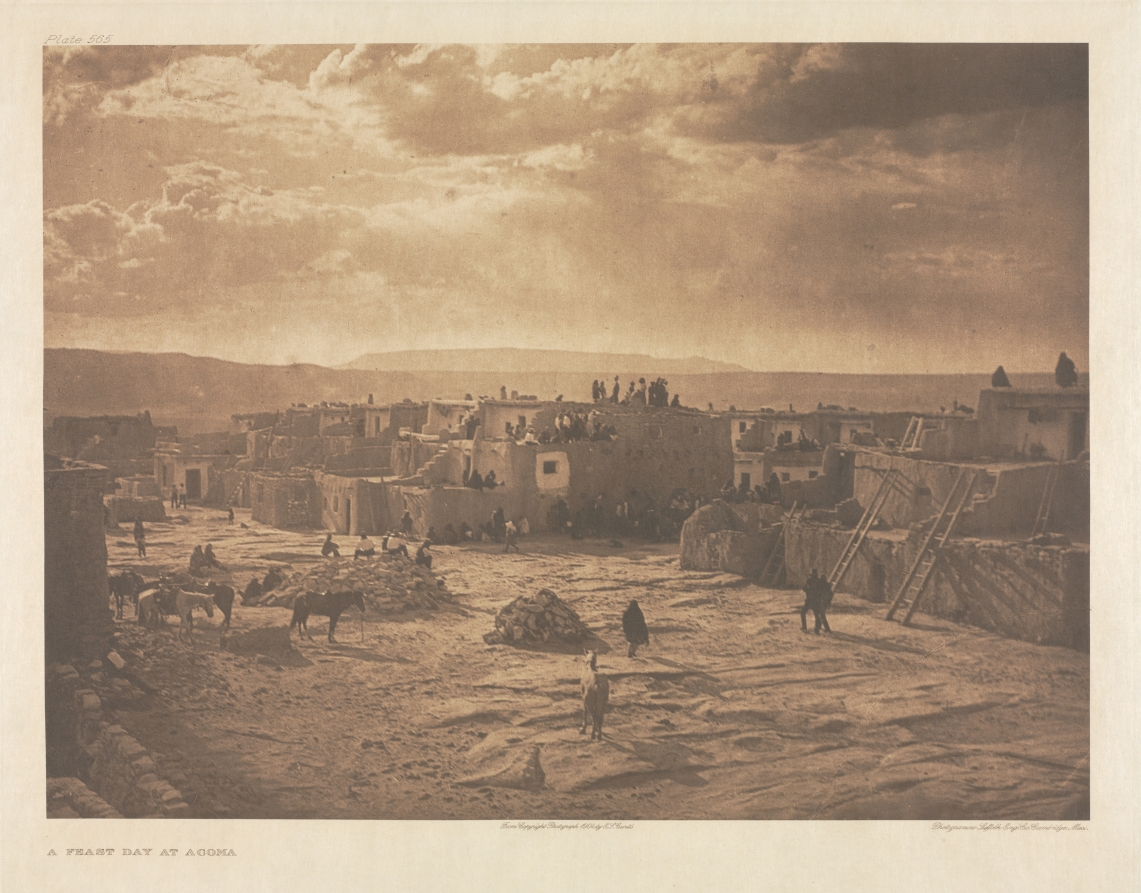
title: Portfolio XVI, Plate 565: A Feast Day at Acoma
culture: America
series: The North American Indian: being a series of Portfolios picturing and describing the Indians of the United States, the Dominion of Canada, and Alaska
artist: Edward S. Curtis (American, 1868–1952)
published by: The University Press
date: 1904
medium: photogravure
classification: Portfolio